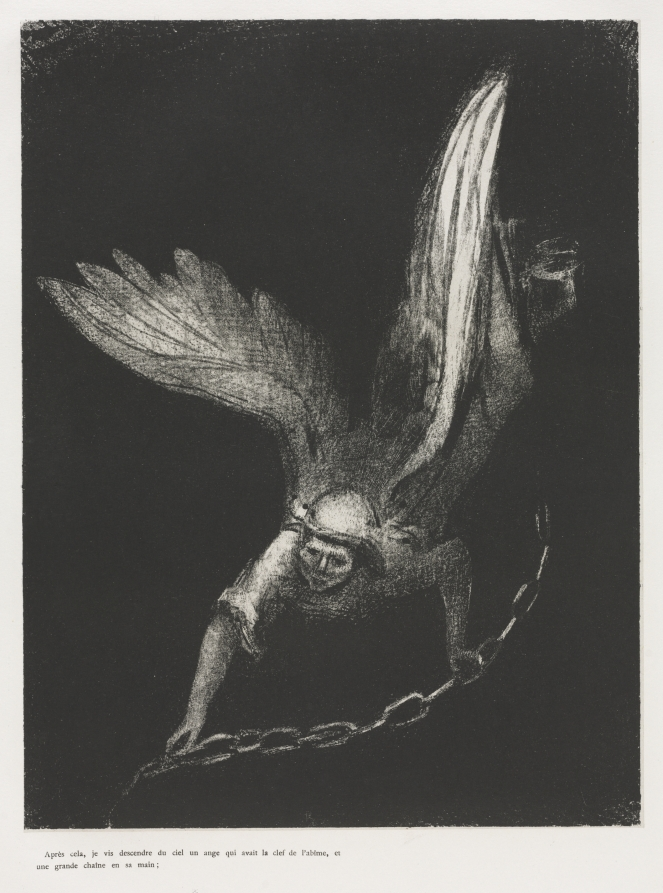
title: And I Saw an Angel Coming Down from Heaven, Having the Key of the Bottomless Pit and a Great Chain in His Hand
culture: France, late 19th Century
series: The Apocalypse of Saint John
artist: Odilon Redon (French, 1840–1916)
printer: Blanchard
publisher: Ambroise Vollard (French, 1867–1939)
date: 1899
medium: lithograph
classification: Print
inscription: initialed in stone at bottom center: OR; printed at lower left, below image: Après cela je vis descendre du ciel un ange qui avait la clef de l'abîme, et / une grande chaîne en sa main;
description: The last of Odilon Redon’s 11 lithographic portfolios, this series relates to the Book of Revelation from the Christian Bible. The subject had been explored throughout art history, allowing the artist to align himself with past masters, such as Albrecht Dürer. Although Redon often vaguely referenced texts, these prints directly illustrate 12 individual passages, including one about a woman clothed with the sun and another focused on a great star falling from heaven. By the time he created this portfolio, Redon’s reputation was well established. The project was published by art dealer Ambroise Vollard, who began to sell and promote Redon’s work about a year earlier, building a market for his prints in Paris and abroad.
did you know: This is one of the last works where Redon experimented with lithograph and all-black medium. In contrast, bright, dazzling colors characterize his late works.